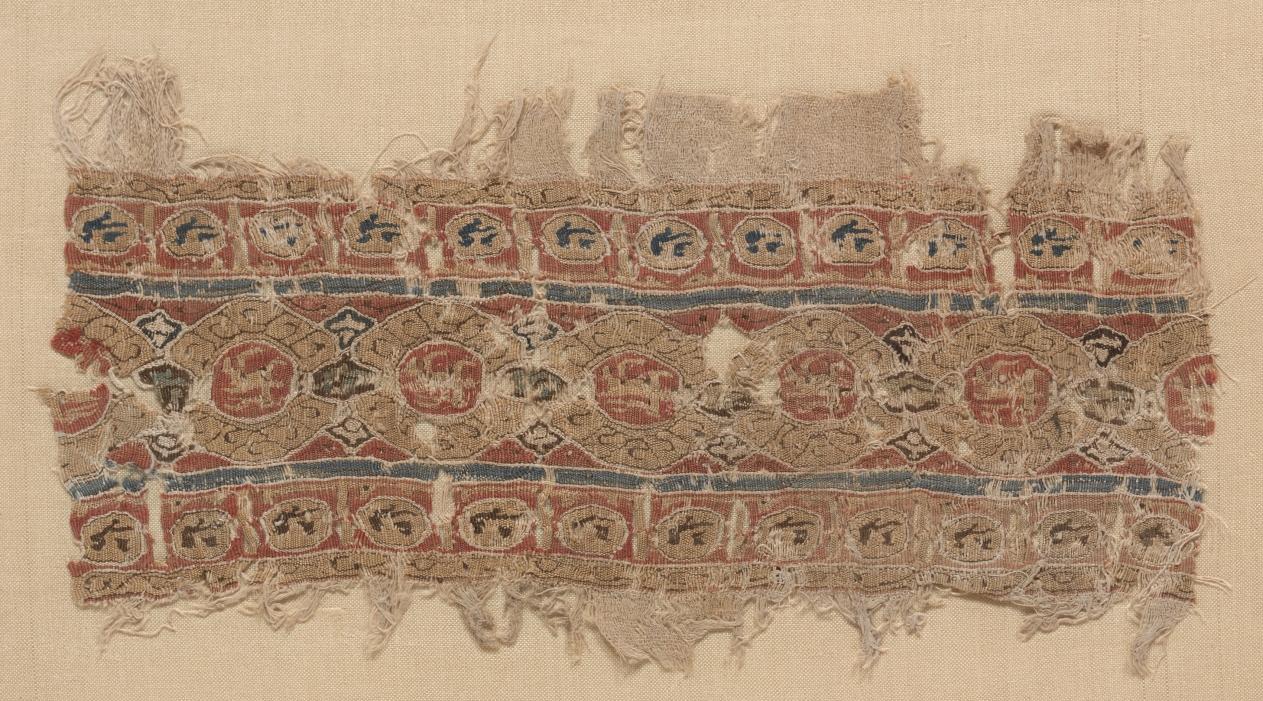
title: Fragment of a Tiraz-Style Textile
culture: Egypt, Fatimid period, 12th century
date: 1100s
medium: tabby ground with inwoven tapestry ornament; linen and silk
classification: Textile